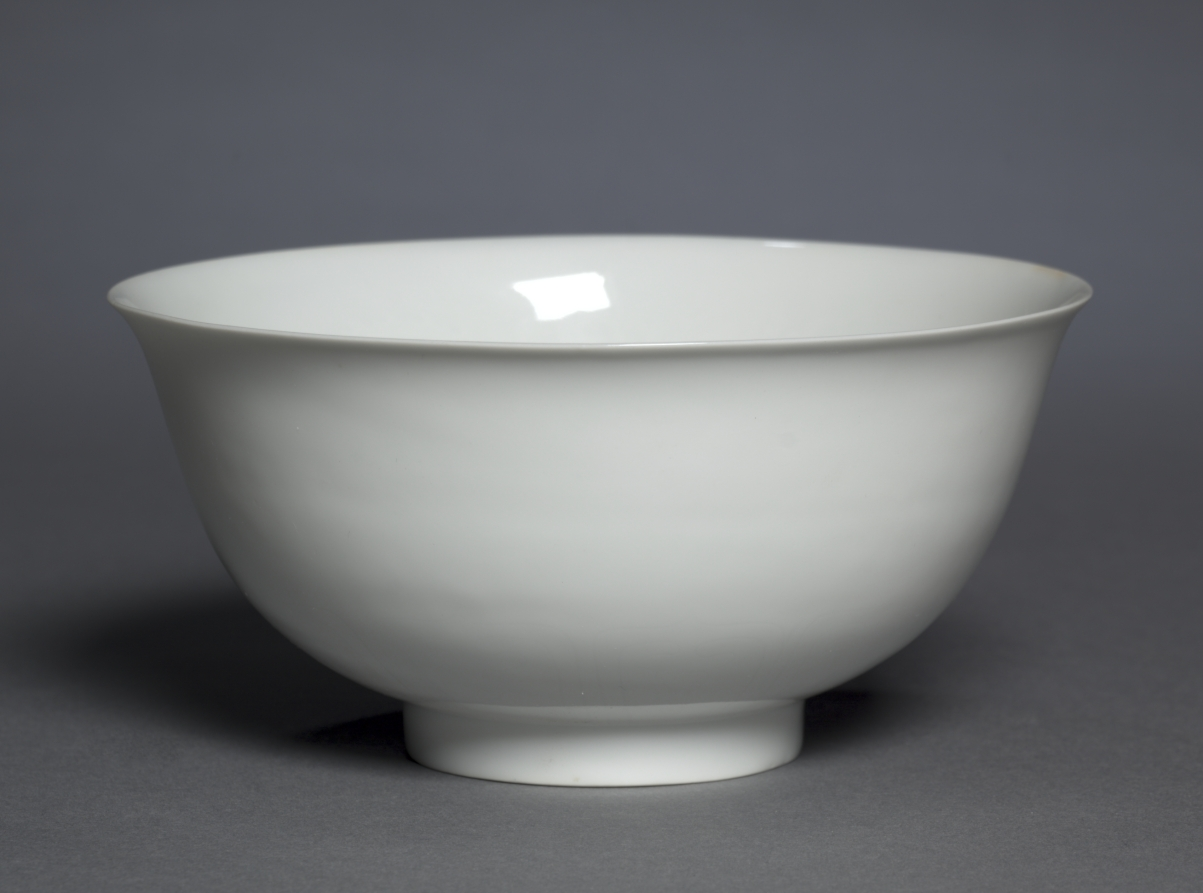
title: Bowl with Dragons and Clouds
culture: China, Jiangxi province, Jingdezhen, Ming dynasty (1368-1644), Yongle period (1403-1424)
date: 1403–1424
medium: porcelain with molded and incised decoration and white glaze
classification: Ceramic